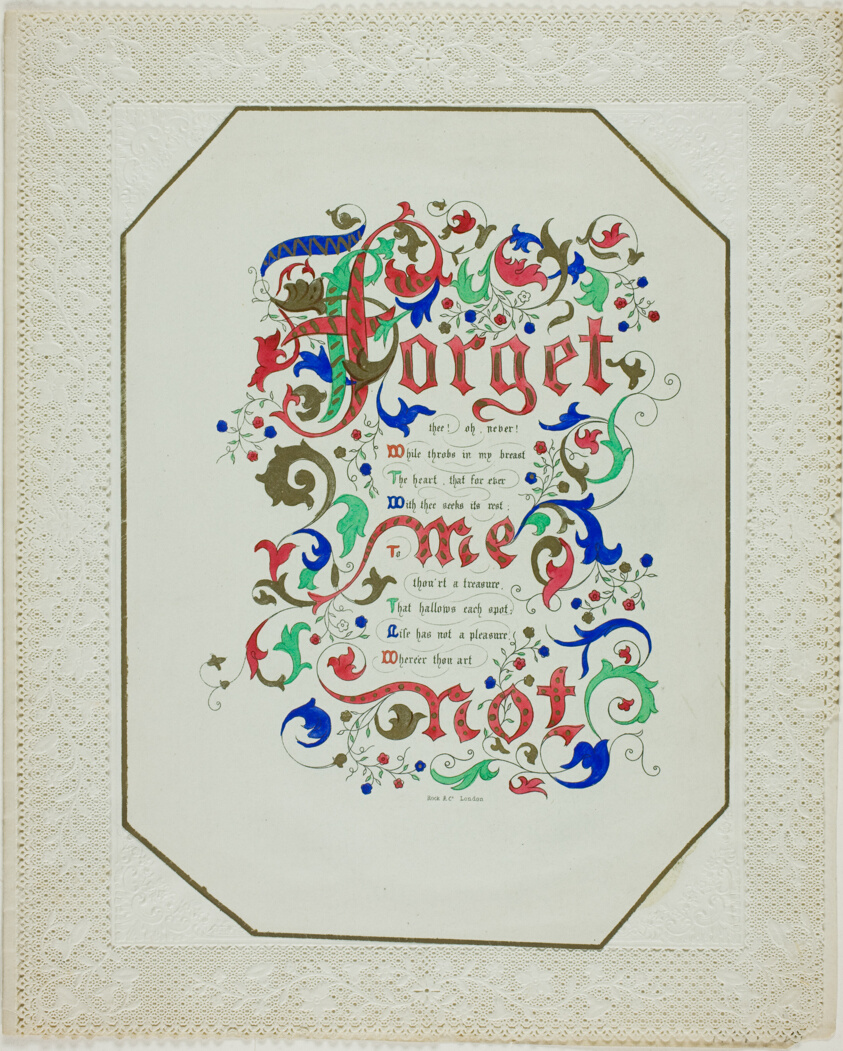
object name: Print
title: Forget Me Not (valentine)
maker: Unknown Artist; English, 19th century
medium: Lithograph with hand-coloring, laid down on cut embossed ivory wove paper (lace)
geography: England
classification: valentine; prints and drawing; print